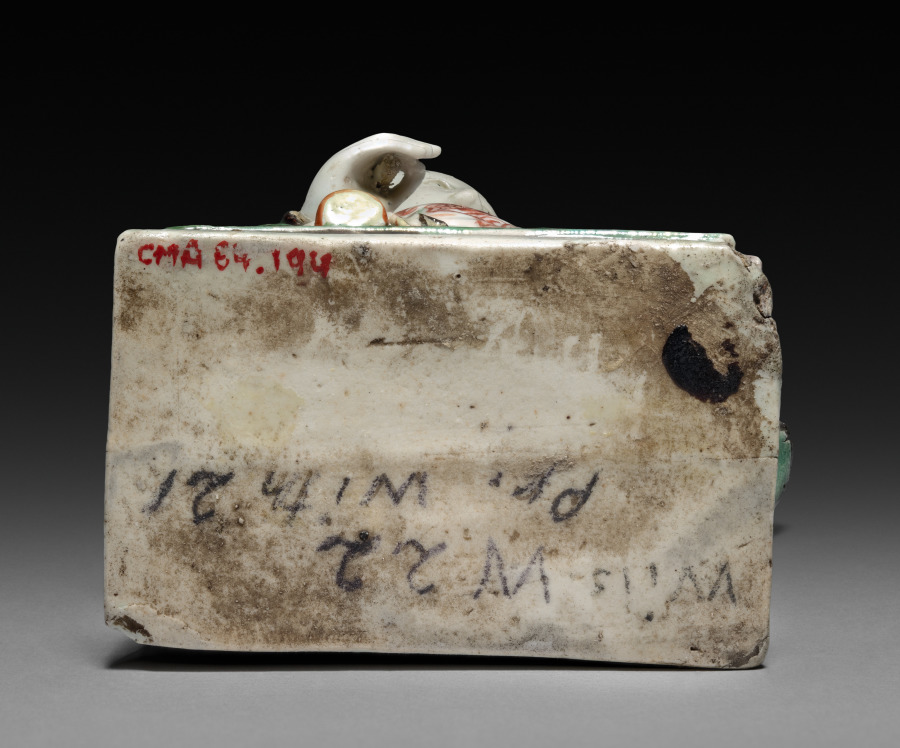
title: Daoist Immortal Han Xiangzi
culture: China, Jiangxi province, Jingdezhen kilns, Qing dynasty (1644-1911), Kangxi reign (1662-1722)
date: 1662–1722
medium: porcelain with famille verte overglaze enamel decoration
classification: Ceramic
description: One of the Eight Immortals, Han Xiangzi was said to be the nephew of the famous Tang dynasty poet Han Yu (768–824). He is usually shown as a young boy holding a flute. Han is wearing a white robe decorated with peonies, hinting at his identity as the patron of florists and his legendary ability to make peonies bloom in winter. A four-clawed dragon, a decorative motif typically used for imperial nobility and certain high-ranking officials, decorates Han’s robe.